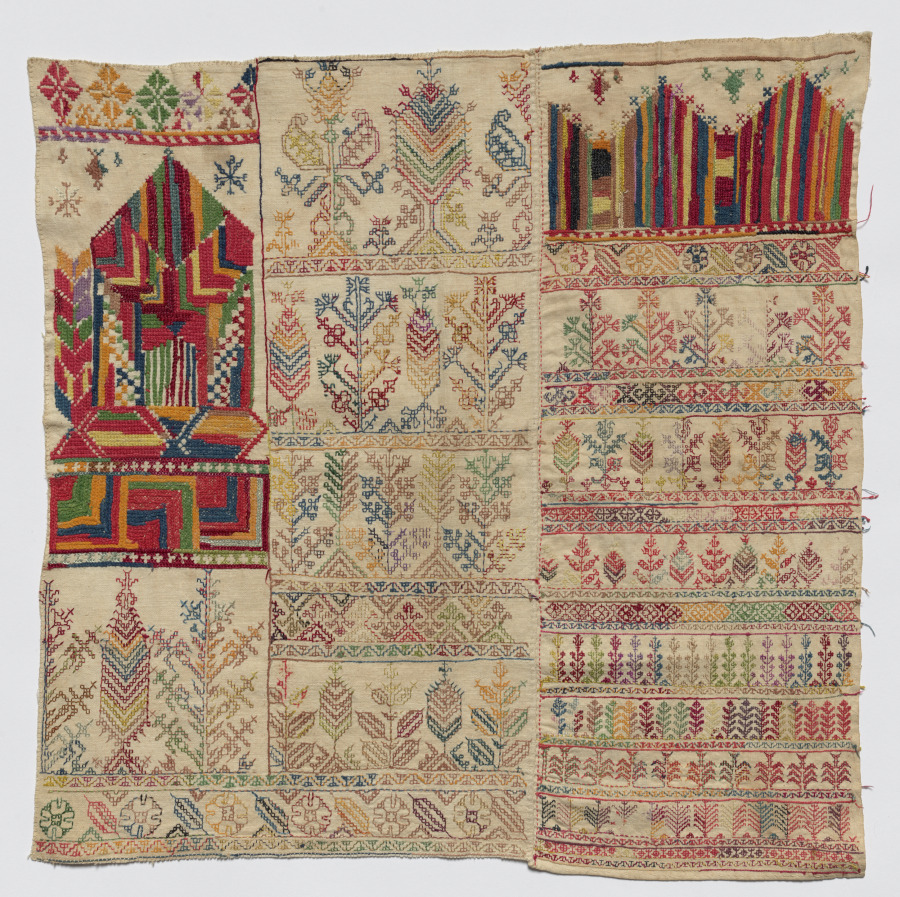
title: Embroidery sampler (chelliga/shelliga)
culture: Africa, North Africa, Morocco, Moroccan embroiderer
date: c. 1700s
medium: Cotton, silk, dye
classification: Sampler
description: These detailed samplers demonstrate the artist's technical range. Here, floral designs, protective open-palm hand motifs (khamsa) and various patterns are embroidered using double-running stitches, straight stitches, and long-armed cross stitches with dyed silk thread. Young women from all social classes would learn these skills from a master craftswoman (mu'allima), who taught within her home.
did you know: Upon completing their training, professionally-trained young women would produce a sampler as a "diploma" testifying to their embroidery skills.